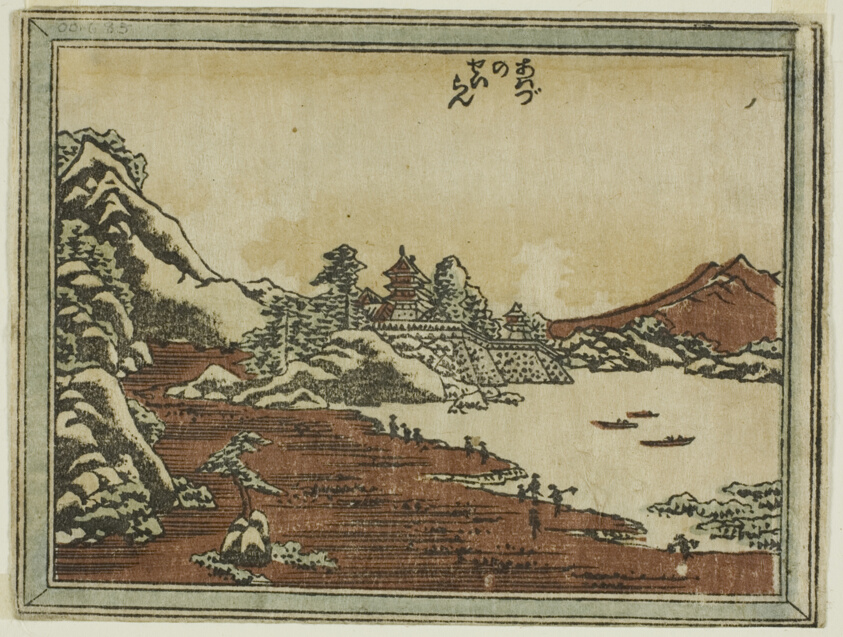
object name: Print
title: Clearing Weather at Awazu (Awazu no seiran), from the series Eight Views of Omi in Etching Style (Doban Omi hakkei)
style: Japanese (culture or style)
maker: Katsushika Hokusai 葛飾 北斎; Japanese, 1760-1849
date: 1804/16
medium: Color woodblock print; horizontal koban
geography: Japan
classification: woodblock print; print; asian art